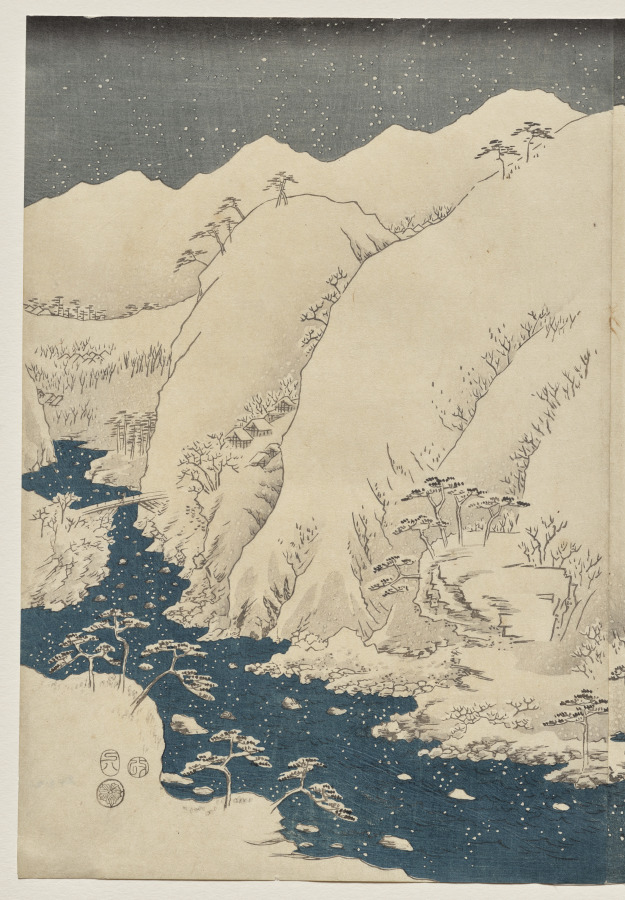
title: Mountain and River on the Kiso Road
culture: Japan, Edo period (1615–1868)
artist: Utagawa Hiroshige (Japanese, 1797–1858)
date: 1857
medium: One of a triptych of color woodblock prints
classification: Print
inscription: Signature: Hiroshige hitsu Publisher: Okazawaya Taheiji (emblem) Censorship seal: aratame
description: Late in his career, Hiroshige explored the poetic theme of setsugekka, “snow, moon, and flowers,” in a set of three triptychs. This panoramic scene features a river passing snow-covered mountains along the Kiso Road.